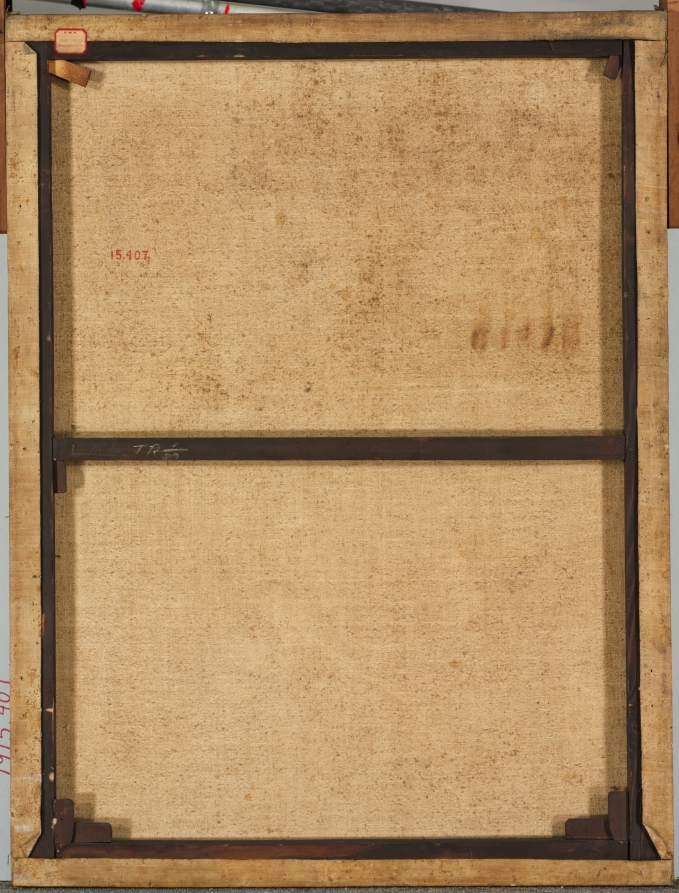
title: Pietà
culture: possibly Italy, Florence, late 16th century, or later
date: late 1500s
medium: oil on canvas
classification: Painting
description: Originating in Germany in the 1300s, the intense moment of lamentation, often referred to as a pietà, has no origin in the Bible. Though it was more widespread in northern Europe, the poignant scene of Mary holding the body of her deceased son expanded into Italy as well. In this painting, Nicodemus supports Christ's upper body, Mary clasps her son's elbow as he lies across her lap, Mary Magdalene kneels at Christ's feet, and John the Apostle covers his face in grief behind her. The crown of thorns upon Christ's head and the blood still visible from his wounds recall the events of the Passion and highlight the sorrow of the Virgin.